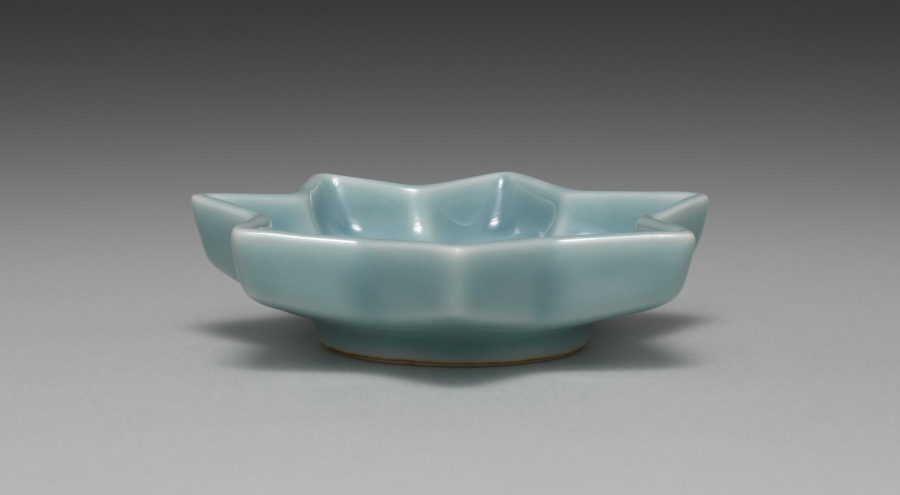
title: Saucer from Maple Leaf-Shaped Saucers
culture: Japan, Meiji period (1868–1912)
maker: Seifū Yohei III (Japanese, 1851–1914)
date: 1893–1914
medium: One of five dishes from a set of ten; porcelain with blue glaze and molded design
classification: Ceramic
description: These maple leaf–shaped saucers, like Yohei III's five shell saucers CMA 2022.188, have a long, horizontal box with a separate compartment for each piece. Now a set of five, these dishes were originally a set of ten, stored in two boxes of five each. From their housings, which accommodate differing numbers of objects, one can hypothesize that while some items created by the Seifu studio were intended to be acquired in larger sets, and thus were perhaps made to order, others, like these, may have been items to be purchased of the shelf in set quantities that allowed clients flexibility in scale. The box for these five saucers describes them as “heavenly blue[–glazed] porcelain” (tenseiji). The veins of the leaves are slightly raised in the clay so that the glaze pools around them and they stand out as white where the glaze thins. There are longer lines at the points of the leaves and shorter ones following the wall of each indentation so that the design has both a horizontal and a subtle vertical dimension.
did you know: These saucers shaped like maple leaves show Seifū Yohei III’s “heavenly blue glaze.”